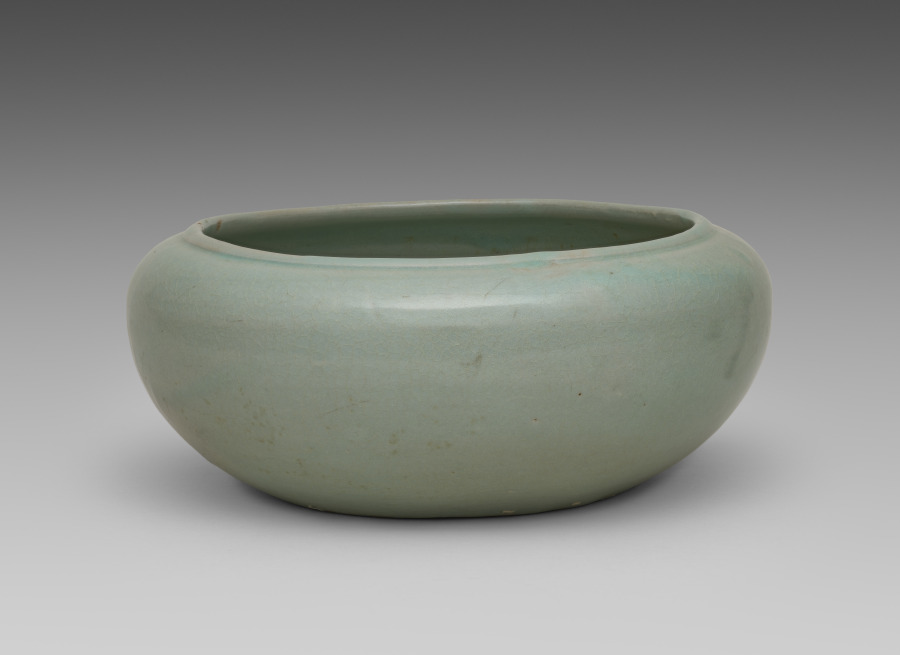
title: Bowl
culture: Korea, Goryeo dynasty (918–1392)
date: 1100s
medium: celadon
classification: Ceramic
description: As early as the seventh century, the practice of drinking tea became an important part of elite culture in Korea. In enjoying teas, elites commissioned a variety of types of utensils and vessels including this large bowl, not only to make their tea-drinking experience more exciting, but also to show their refined taste.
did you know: The distinctive bluish and greenish glaze of Goryeo celadons, shown in this bowl, is the result of distinctive small and long Korean kilns, which maintained a low oxygen saturation with a high level of carbon dioxide.